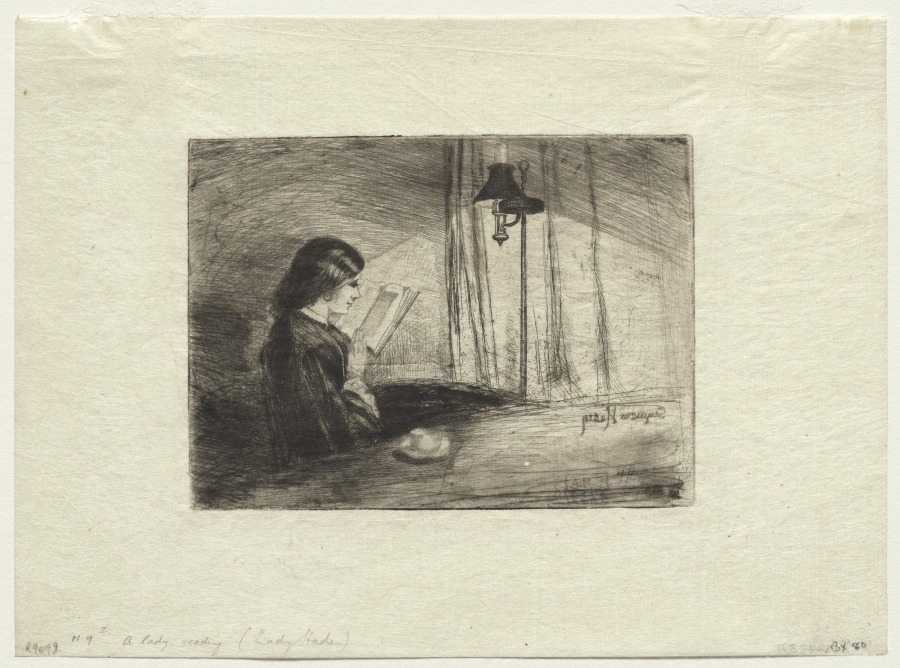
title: A Lady Reading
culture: England, 19th century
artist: Francis Seymour Haden (British, 1818–1910)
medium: etching and drypoint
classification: Print